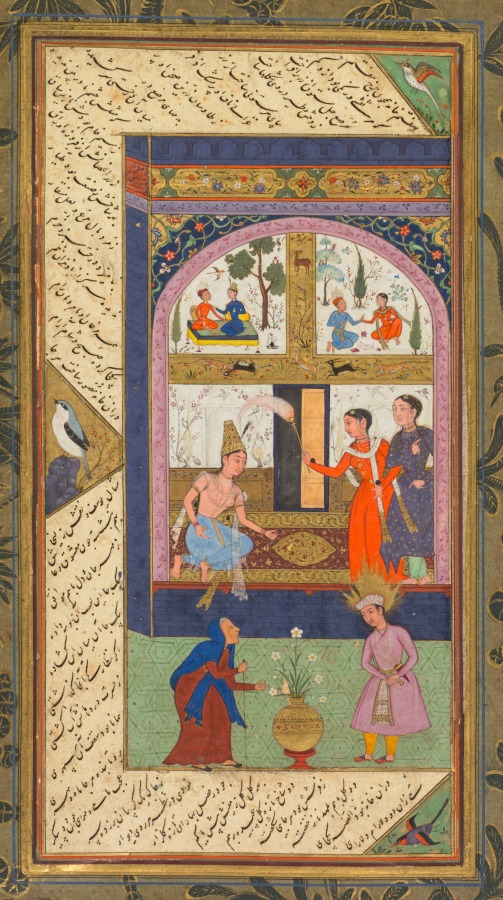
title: Zulaykha in her palace and as an elderly woman with Joseph (recto), from a Panj Ganj (Five Treasures) of Abd al- Rahman Jami (Persian, 1414–1492)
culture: Western Afghanistan, Herat (text); Mughal India (paintings)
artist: Mushfiq (Indian, active early 1600s)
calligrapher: Sultan 'Ali al-Mashadi (Iranian, 1430–1520)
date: 1603–7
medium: Gum tempera, ink, and gold on paper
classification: Painting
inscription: [[Upper left of painting, against a red background, in nasta’liq script]] ' amal - i Mushfiq sana 1015 Text on verso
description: The golden pot of white narcissus flowers at the bottom center of the painting signals that Zulaykha, leaning on her staff to the left, will imminently have her youth and beauty restored. In this Persian retelling of the Old Testament account from the Bible, Zulaykha lusted after Joseph, even though she was already married to Potiphar. Joseph, with the golden halo, resisted her advances until she became a widow and retained his youth, because of his extreme virtue. Above, Zulaykha as a young woman waits for Joseph in her house where murals of them as a happy couple are painted on the walls.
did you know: Zulaykha is shown four times: twice in the murals, seated in the center, and below when she is much older.